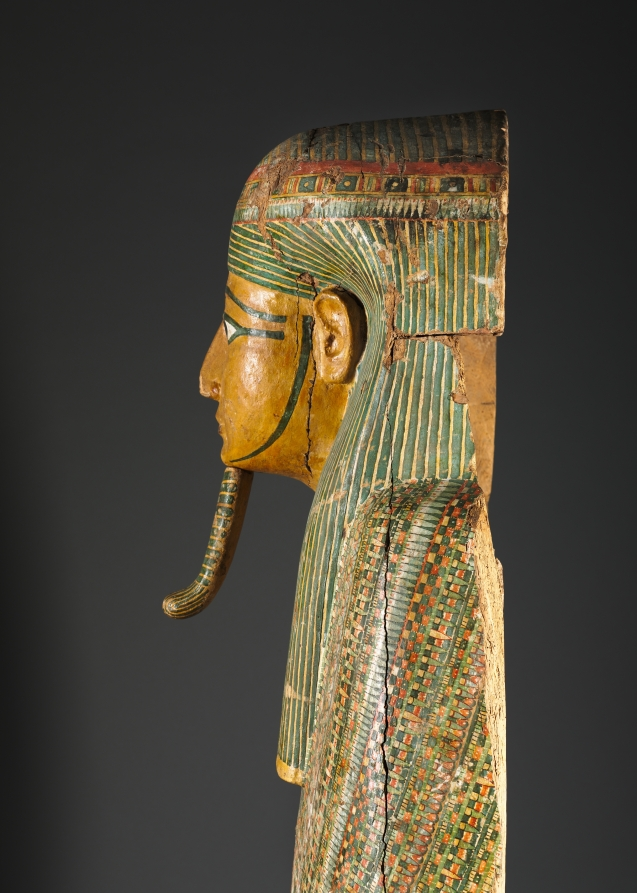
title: Coffin of Bakenmut (lid)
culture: Egypt, Thebes, Third Intermediate (1069–715 BCE), Dynasties 21–22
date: c. 1000–900 BCE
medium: gessoed and painted sycamore fig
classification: Funerary Equipment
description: The coffin of Bakenmut is one of the finest examples of painted wooden coffins made for the priests of Amen and their families at Thebes during Dynasty 21 and early Dynasty 22. The pharaohs of this time were no longer buried in the Valley of the Kings, but instead built tombs in the Delta, far to the north, where they resided. Security was lax in the Theban necropolis. The coffins and funerary goods of the wealthy citizens of Thebes were placed in unmarked and undecorated family tombs cut into the cliffs on the west bank of the Nile. All the care and detail that in more prosperous times were devoted to the decoration of the tomb chapel were now lavished on the elaborately painted coffins. Every available surface is crowded with religious scenes, images of funerary gods and goddesses, protective spells, and magical symbols. The deceased appears mummiform. An elaborate floral collar entirely covers the upper body, exposing only the separately attached hands (now lost). A pair of red "mummy braces" are crossed over the chest, their point of intersection marked by a winged sun disk. The lower body is covered with tiny figures modeled in gesso against a yellow background, which gives the effect of gold inlaid with glass or semiprecious stone. The decoration on the interior features two deified dead kings of Dynasty 18. Although these rulers had lived centuries before, memory of their greatness was still very much alive. The main scene near the top depicts Tuthmosis III, the great military pharaoh, who lived 500 years before Bakenmut. Posed as a mummy, the ruler wears a brilliant feathered garment enfolding him with falcon’s wings. The scene below features back-to-back seated images of Amenhotep I, regarded as the patron of the Theban cemetery and worshiped as a local god there.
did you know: Originally another smaller coffin was placed inside this outer coffin and in that the deceased with a mummy board would have rested.